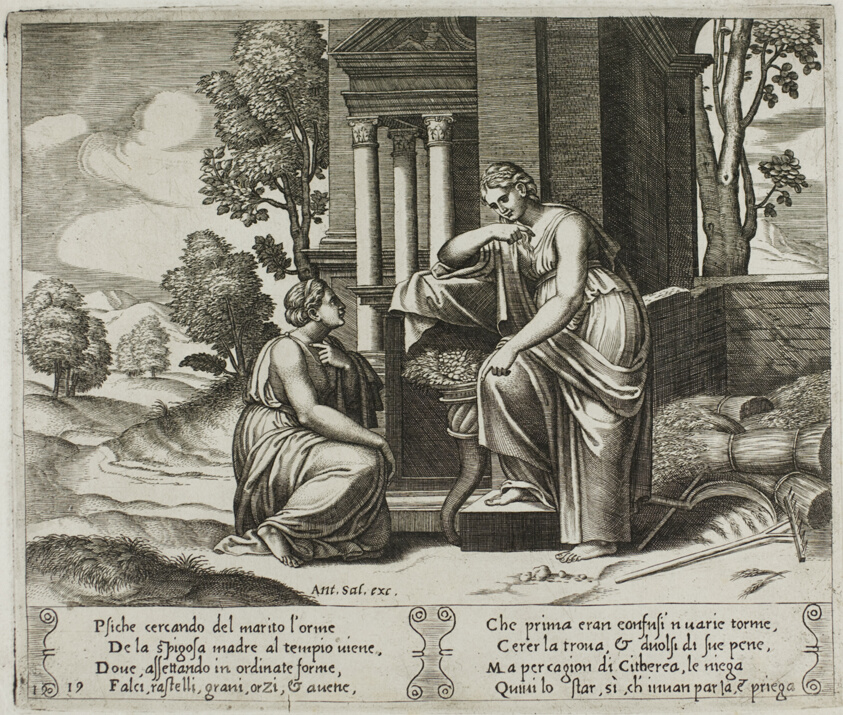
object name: Print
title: Ceres Refusing Any Assistance to Psyche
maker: Master of the Die (Italian, active c. 1530-1560); after Michiel Coxcie I (Flemish, 1499-1592); in turn, inspired by Raffaello Sanzio, called Raphael (Italian, 1483-1520)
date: 1530/40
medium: Engraving in warm brown ink on cream laid paper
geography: Italy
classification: engraving; print; prints and drawing